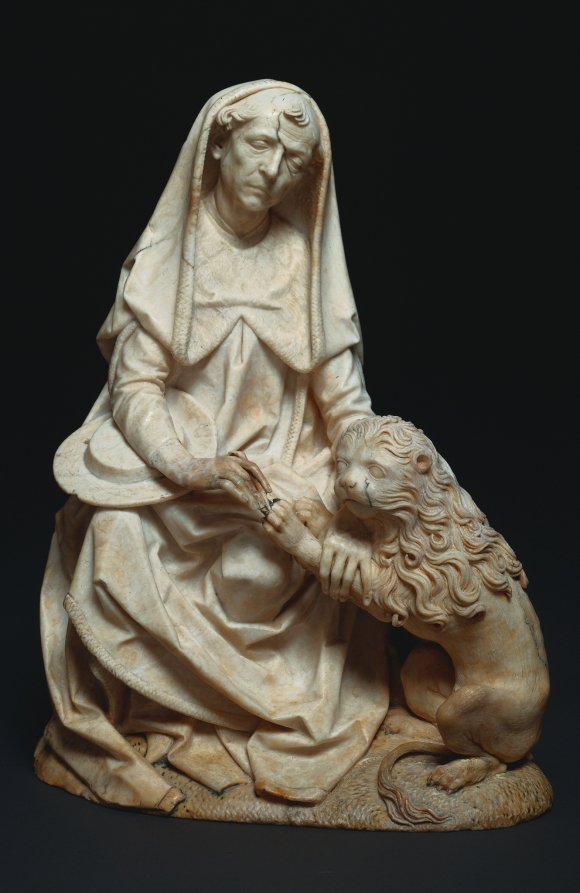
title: Saint Jerome and the Lion (From the former Church of St. Peter in Erfurt)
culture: Germany, Würzburg, late 15th Century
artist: Tilman Riemenschneider (German, active Würzburg, c. 1460–1531)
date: c. 1495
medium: alabaster, traces of polychromy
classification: Sculpture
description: According to legend, Saint Jerome (347–420 bce) lived in the desert, where he removed a thorn from an injured lion. Jerome is venerated in the Catholic Church as a Church Father, an important early author of Christianity. Here, he wears cardinal’s clothing from around 1500. Tilman Riemenschneider focused on Jerome’s relationship with the lion, creating empathy for the wounded animal. The delicacy of the depiction, which may have been partially painted to add highlights, is typical of alabaster, as is its fine polishing. The cord of the cardinal’s hat, missing today, may have been supplemented from another material.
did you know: In the story Saint Jerome encounters a fearsome lion, here depicted as diminutive, gentle, and submissive.